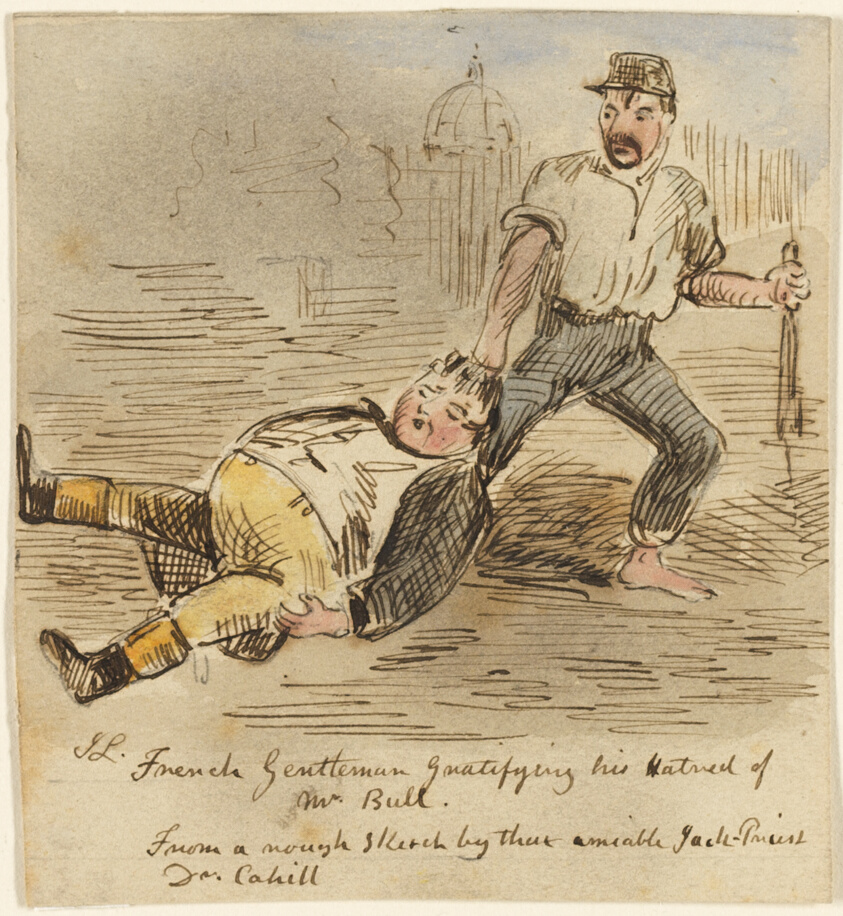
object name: Drawing and Watercolor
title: French Gentleman Gratifying His Hatred of Mr. Bull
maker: John Leech (English, 1817-1864)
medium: Watercolor and pen and brown ink, over graphite, on cream wove paper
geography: England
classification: watercolor; drawings (visual works); prints and drawing